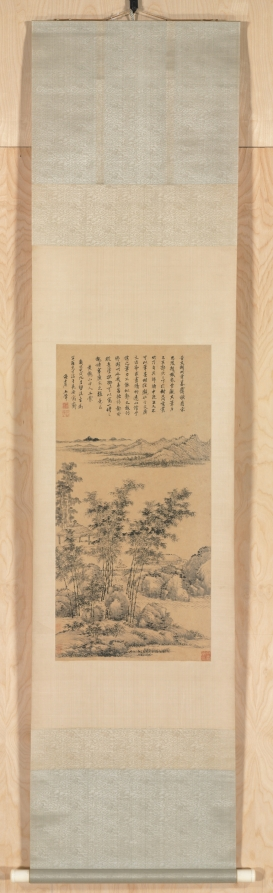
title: Tall Bamboo and Distant Mountains, after Wang Meng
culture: China, Qing dynasty (1644-1911)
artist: Wang Hui (Chinese, 1632–1717)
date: 1694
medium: Hanging scroll; ink on paper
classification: Painting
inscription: 昔文湖州有暮靄橫看。宋思陵題識卷首：觀其筆力不在郭煕之下。於樹石間寫叢竹，乃自其肺腑中流出，又不可以筆墨畦徑觀也。 子文廣文出紙求畫修竹遠山。惜乎僕之筆力，不能似郭。又敢彷彿湖州也哉？至若拙朴鄙野，縱意塗抹，聊可以寫一時之趣。姑塞廣文之雅意云。黃鶴山中人王蒙書。 歲次甲戌九月望後三日為冝翁先生臨于長安寓齋。海虞, 王翬。[印]王翬之印; 石谷子.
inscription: 3 additional seals: 1 of Pang Yuanji 龐元濟 (1864–1949); 2 unidentified.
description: Wang Hui studied paintings by earlier masters and digested their styles with unceasing virtuosity. He had such enduring affection for a landscape by Wang Meng 王蒙 (about 1308–85) that between 1686 and 1712, he made several copies, like this example. One of his compositional transformations here was moving the scholar from the pavilion directly into the landscape by the stream. His faithful copying also included inscriptions. Wang Meng had written that he was trying to resuscitate the style of an earlier artist, Wen Tong (1018–1079); therefore, Wang Hui sought to revive both Wang Meng and Wen Tong.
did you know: As a leading figure in the Orthodox School of Chinese painting, Wang Hui believed that the act of painting was a dialogue with one or more masters of the past.